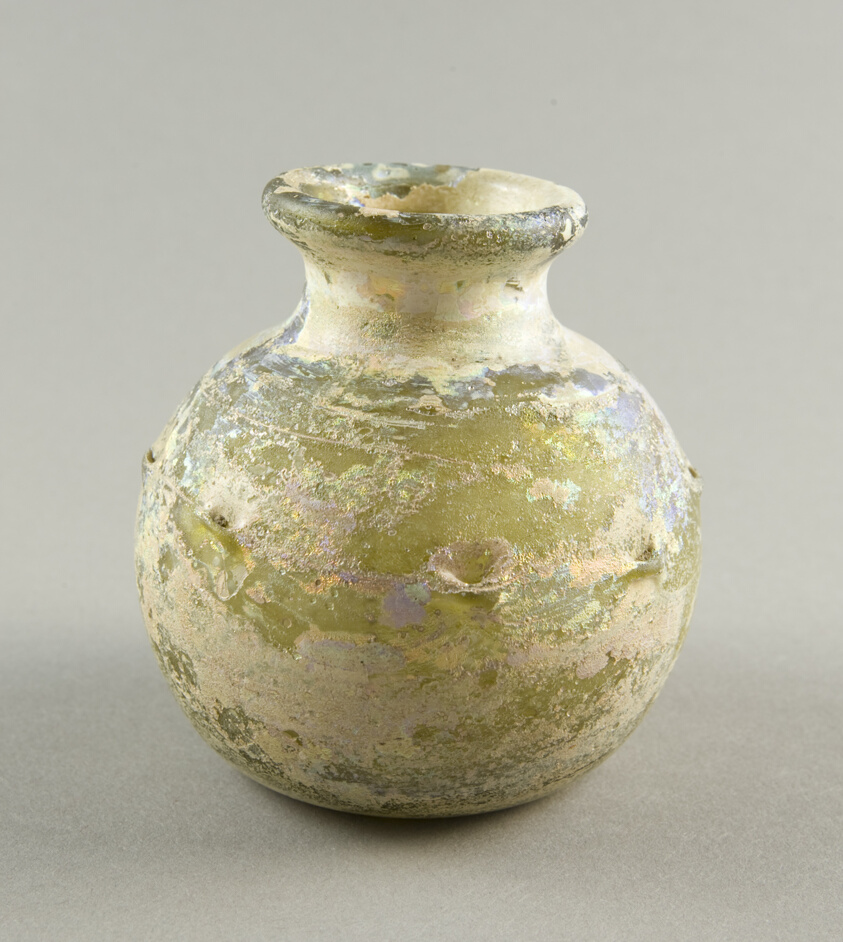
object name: Vessel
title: Jar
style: syrian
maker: Roman; Levant or Syria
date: 2nd-4th century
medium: Glass, blown technique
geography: Syria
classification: vessel; glass; ancient art